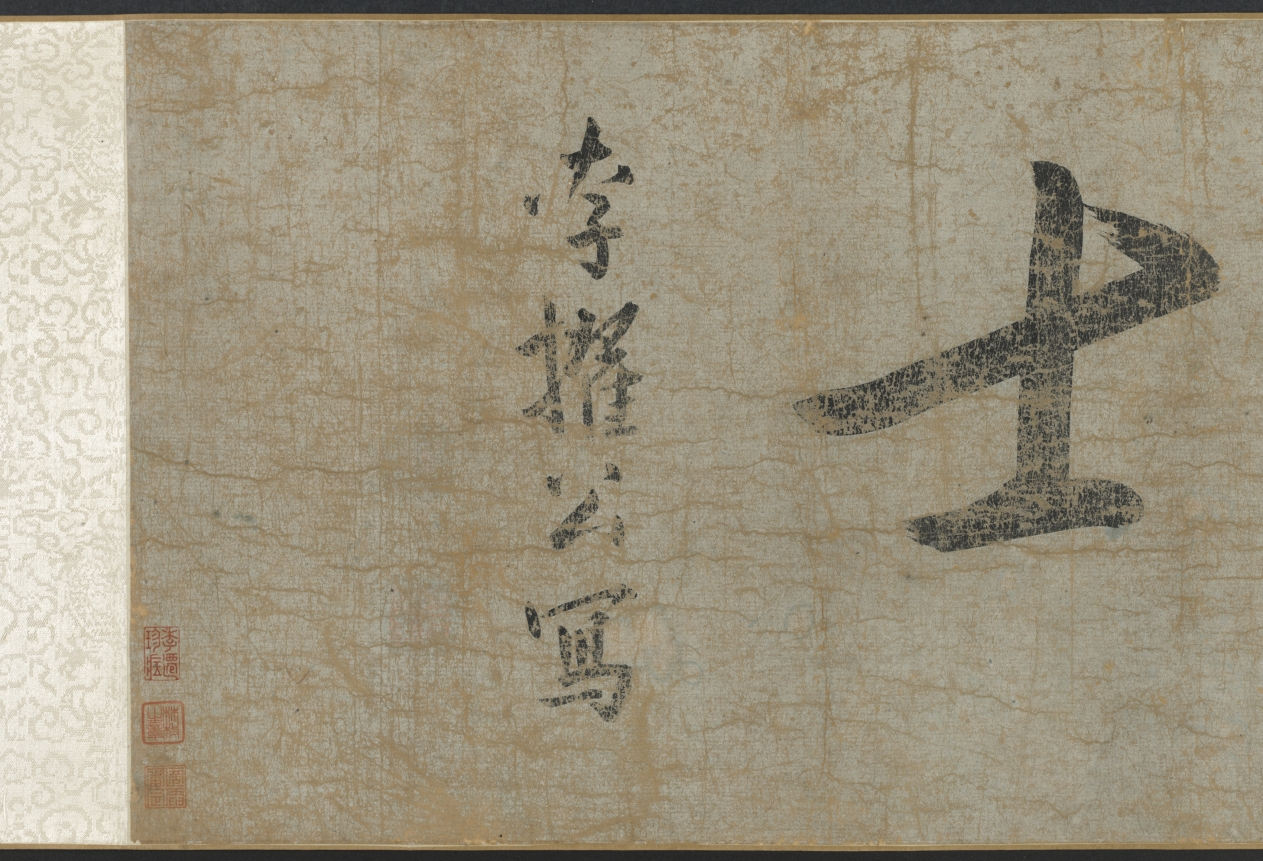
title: Scholar-Hermits in the Autumn Mountains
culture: China, Ming dynasty (1368–1644)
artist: Tang Yin (Chinese, 1470–1523)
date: 1500–1510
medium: handscroll, ink and light color on silk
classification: Painting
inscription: Artist's signature and 2 seals at end of scroll: Tang Yin [seals] T'ang Po-hu; T'ang Tzu'wei t'u-shu.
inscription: Title on frontispiece by Li Cho-kung (dates unknown).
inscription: 1 colophon and 11 additional seals: 1 colophon dated 1915 of Wu Tso-hsi (19th-20th c.); 2 seals of Gao Qifeng 高奇峰 (1889–1933); 5 seals of C. C. Wang 王季遷 (1907–2003); 4 seals unidentified.